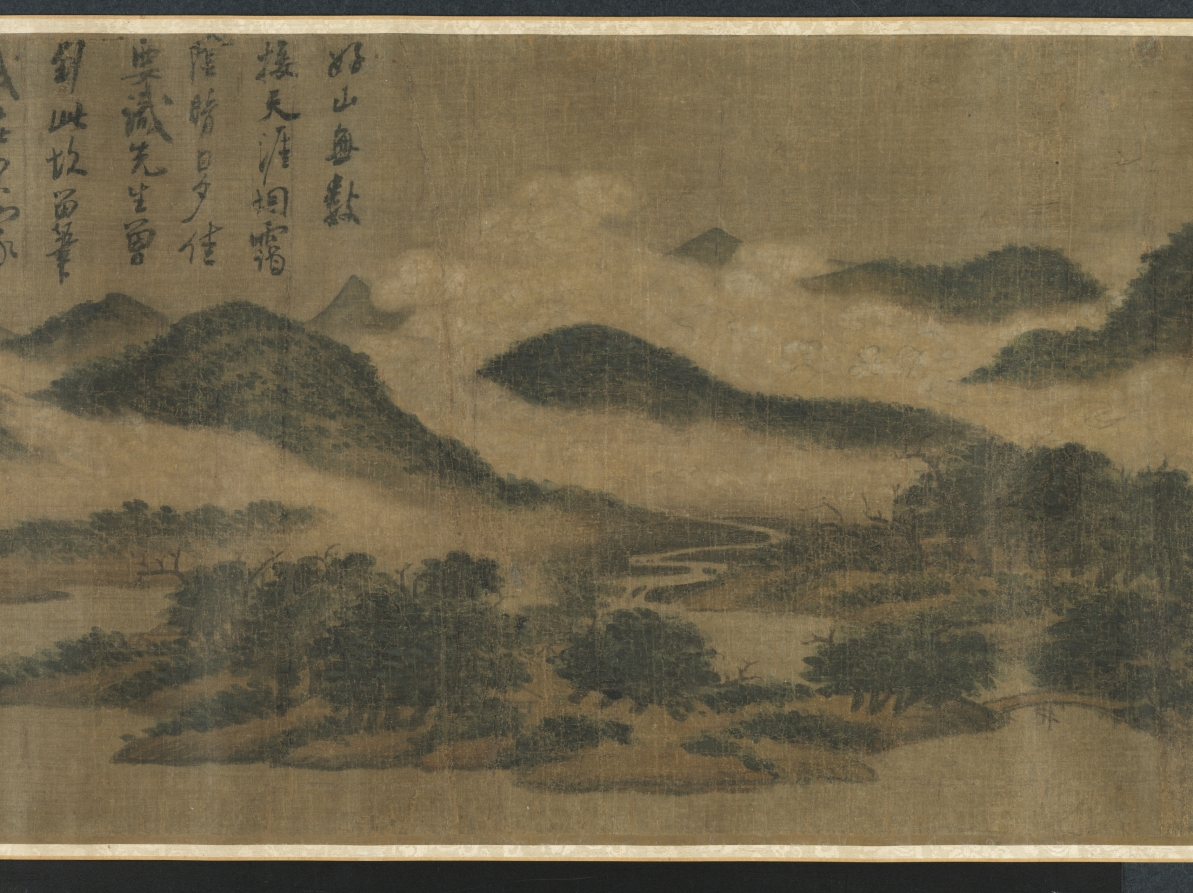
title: Cloudy Mountains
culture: China, Southern Song dynasty (1127-1279)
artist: Mi Youren (Chinese, 1072–1151)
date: 1130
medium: Handscroll; ink and color on silk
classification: Painting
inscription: 好山無數接天涯，烟靄陰晴日夕佳。/ 要識先生會到此，故留筆戲在君家。/ 庚戍歲，辟地新昌作。元暉。/ [seal] 元暉戲作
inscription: [Seal] 安陽孫氏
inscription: [Seal] 畢瀧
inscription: [Seal] 成親王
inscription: [Seal] 永瑆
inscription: [Seal] 錫三 appears twice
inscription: [Seal] 養性齋珍藏書畫印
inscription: [Seal] 芷陔審定真跡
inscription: [Seal] 玉簡齋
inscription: 2 colophons (1 dated 1650), inscription dated 1647, and 2 seals of Wang To (1592–1652)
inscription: 1 colophon, dated second month of the gengyin year 庚寅 (1650), and 2 seals of Chen Kuang 陳爌 (1646 jinshi degree)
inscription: 7 seals unidentified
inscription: A separate scroll containing six colophons on Cloudy Mountains exists; the inscribers are Luo Zhenyu 羅振玉 (1866–1940), Naito Torajiro 內藤虎次郎 (1866–1934), Nagao Ko 長尾甲 (1864–1942), and Wu Changshuo 吳昌碩 (1844–1927). Naito Torajiro alone wrote three colophons.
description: Cloudy Mountains captures the view of a lush and misty riverscape, an impression of Mi Youren’s new environment, painted in a moment of peace. With the fall of the Northern Song dynasty in 1127 upon the Jurchen’s military invasion, Mi Youren fled south across the Yangzi River. In 1130, he had reached Xinchang in Zhejiang province and thanked his host with this painting for having given him shelter. Mi Youren was the oldest son of the art critic Mi Fu (1051– 1107); both developed a distinct style of mountain scenery by accumulating wet ink dots that create a hazy atmosphere.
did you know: This scroll is one of the museum’s earliest dated Chinese paintings.